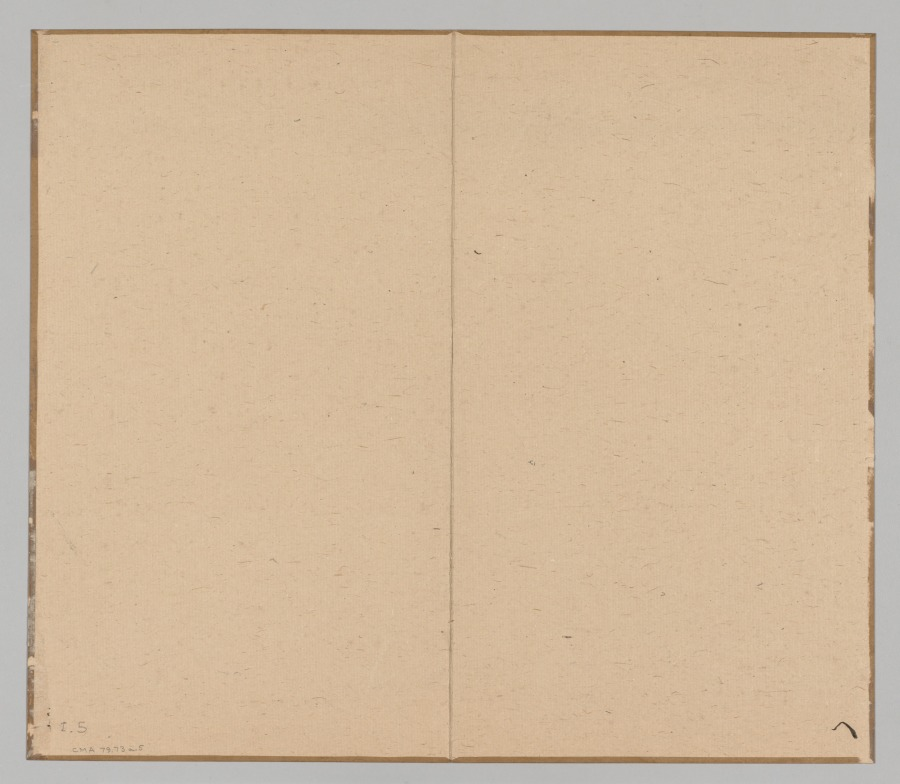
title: Reverberations of Taiga, Volume 1 (leaf 5)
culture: Japan, Edo period (1615–1868)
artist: Aoki Shukuya (Japanese, d. 1802)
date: mid- to late 1700s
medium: double-leaf from a pair of albums; ink and light color on paper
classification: Portfolio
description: Traditionally, young painters in Japan began their studies with an established master-painter. The master's compositions invariably became models that the apprentice copied to learn various ink and brush techniques. Shukuya was a pupil of the famous Kyoto artist Ikeno Taiga, whose style is reflected in these sketches of rocks, trees, and mountains.